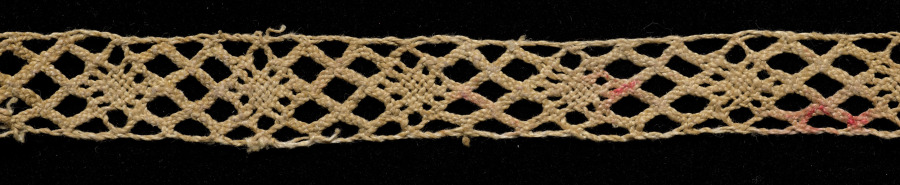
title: Lace Insertion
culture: Italy, Venice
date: 1540–60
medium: Bobbin lace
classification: Lace